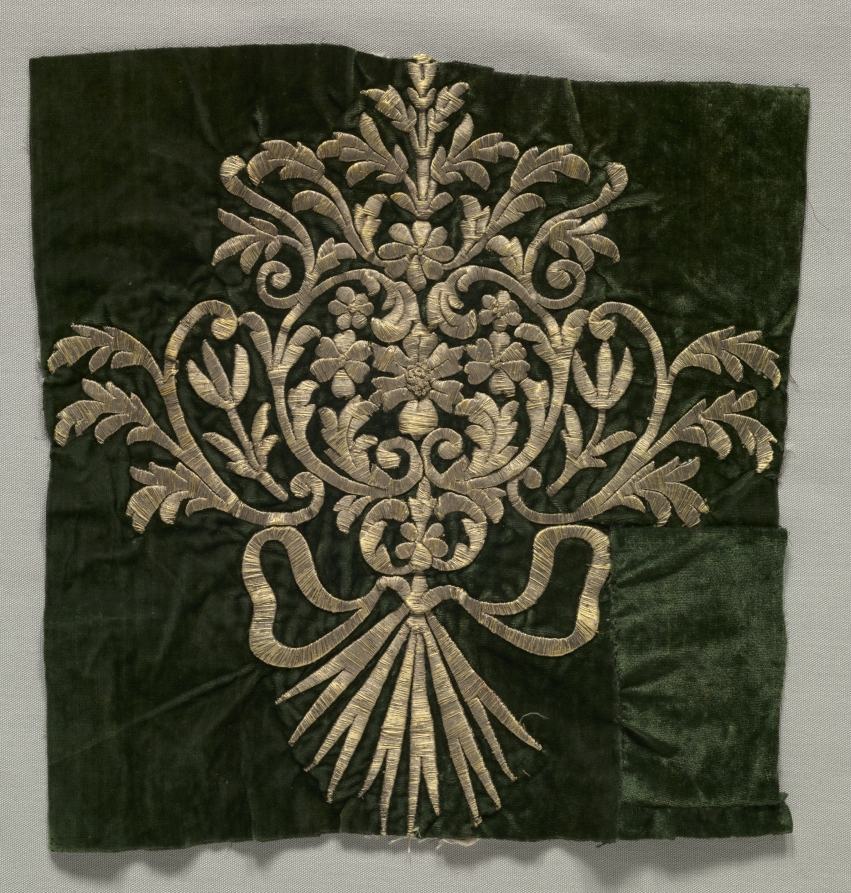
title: Embroidered Fragment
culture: Turkey, 19th century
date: 19th century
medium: embroidery: silk and metal filé on silk velvet ground; cotton backing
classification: Embroidery